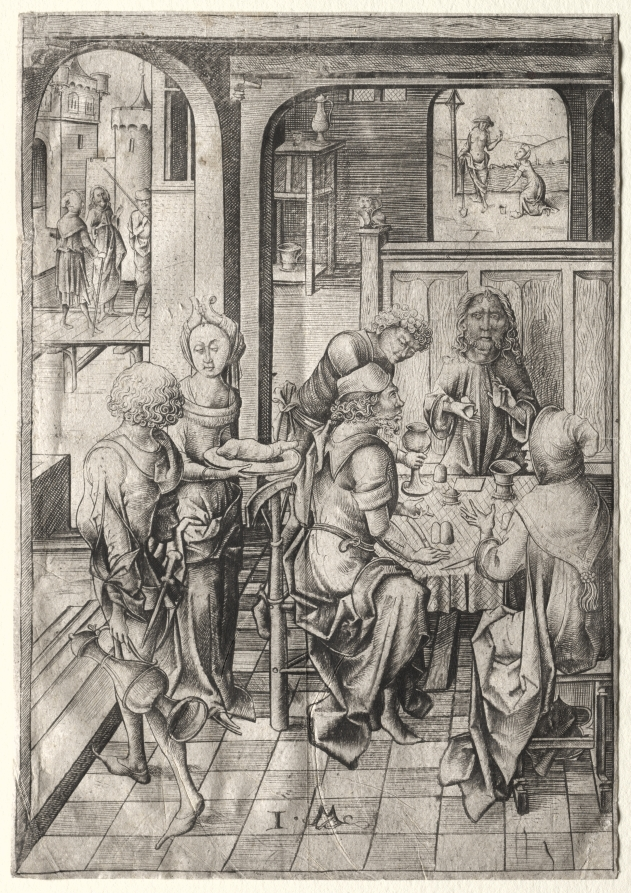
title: Supper at Emmaus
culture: Germany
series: The Passion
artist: Israhel van Meckenem (German, c. 1440–1503)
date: c. 1480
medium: engraving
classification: Print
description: In the New Testament, the Supper at Emmaus takes place after Christ’s Resurrection, when two of his apostles invite him—whom they suppose is a pilgrim and stranger—to dine with them. Israhel van Meckenem staged the scene at an inn, where the three are served food and drink. Christ breaks the bread and blesses it, a gesture that reminds the two disciples of the Last Supper. They thus recognize Christ as their resurrected savior. Van Meckenem contrasted the knowing eyes and gestures of the disciples with the indifferent actions of the servants who carry and pour the wine.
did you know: Artists often use views through rooms to create a sense of perspective. Here, this technique allows the viewer to follow Christ from the garden, to the bridge, and into the inn.